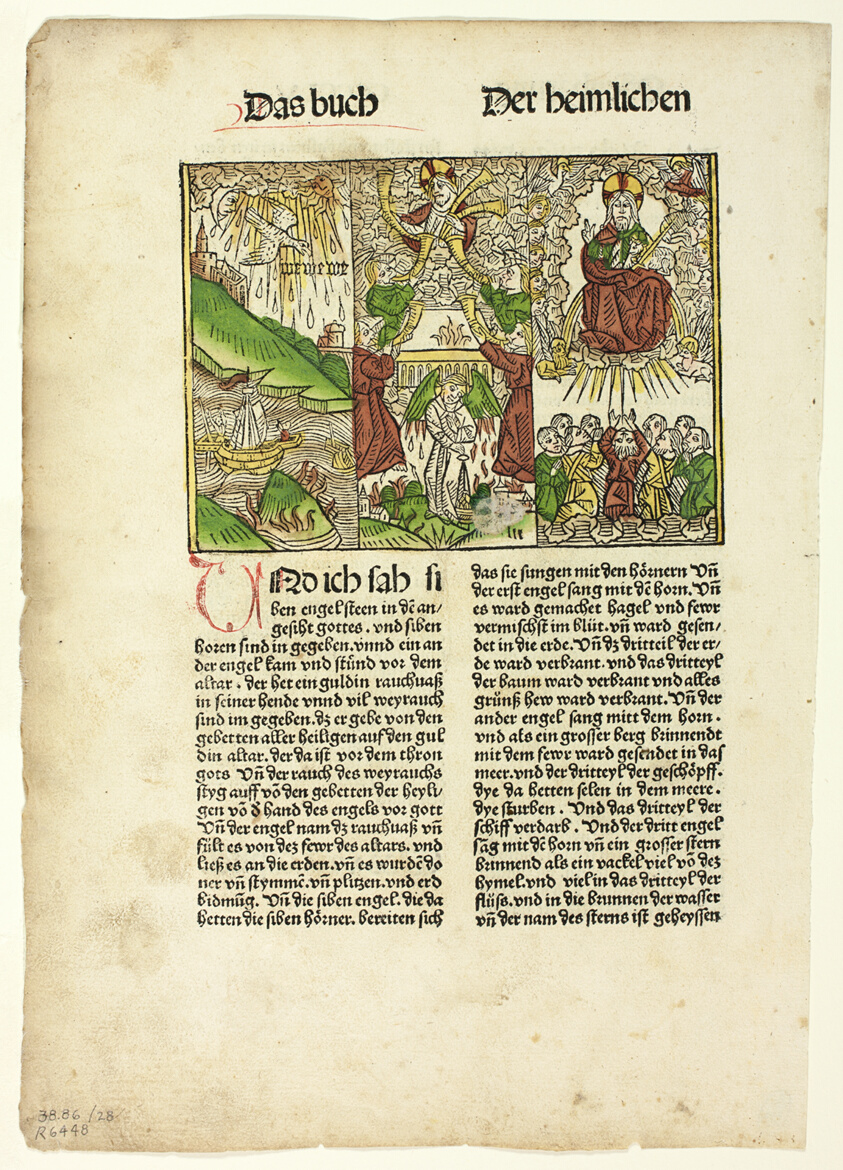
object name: Print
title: Book of Revelation (Seven Trumpets) from The Bible (also called the Tenth German Bible), Plate 28 from Woodcuts from Books of the 15th Century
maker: Unknown Artist (Strasbourg, late 15th century); printed and published by Johann Reinhard Grüninger (German, c. 1455–1532); portfolio text by Wilhelm Ludwig Schreiber (German, 1855–1932)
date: 1485, portfolio assembled 1929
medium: Woodcut in black with hand-colored additions, and letterpress in black with rubrication (recto and verso), on cream laid paper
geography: Germany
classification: woodcut; print; prints and drawing